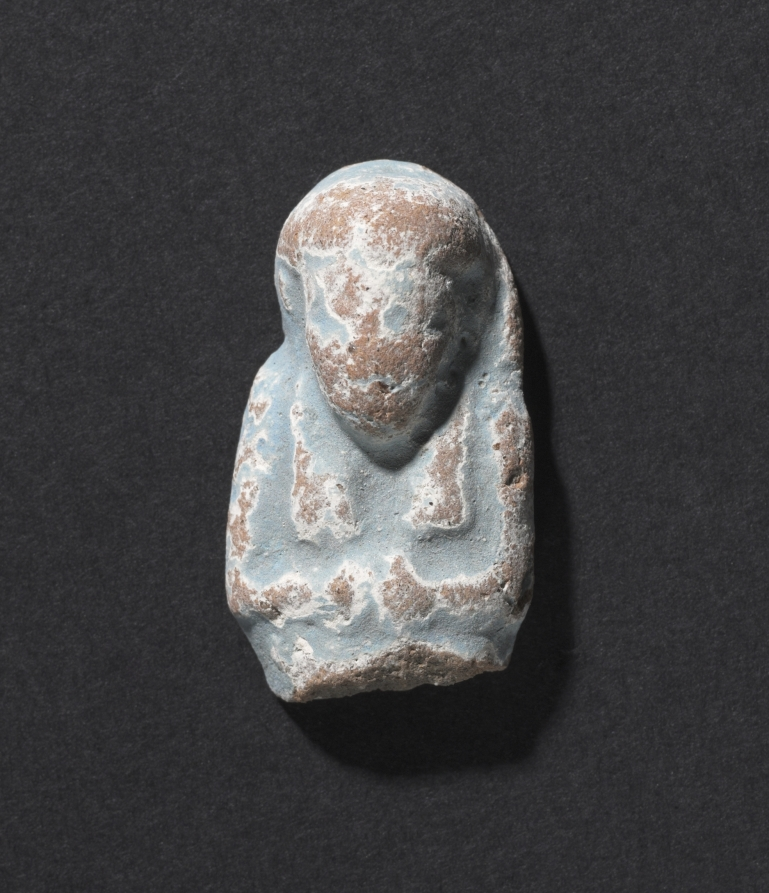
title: Shawabty of Ditamenpaankh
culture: Egypt, Late period (715–332 BCE), Dynasty 25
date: 715–656 BCE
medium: terracotta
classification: Funerary Equipment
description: High demand for shawabtys in the Late Period, a time when as many as 400 or more shawabtys were placed in the tomb with the deceased, gave rise to a specialized container for storing them: the shawabty box. This example is inscribed for the lady of the house, Ditamenpaankh, and was probably one of a pair originally made for her. The single-masted boat on the box's lid is perhaps an allusion to the pilgrimage of the deceased to the holy city of Abydos, the cult city of Osiris, king of the dead. The shawabtys inside are crude, mass-produced examples cast in an open mold. Made of terracotta, their blue paint imitates more costly shawabtys made of faience. As for the shawabty spell, it has been removed from its traditional location on the shawabty's front and relocated onto the sides of box, where it needed only to be written once, thus expediting production.